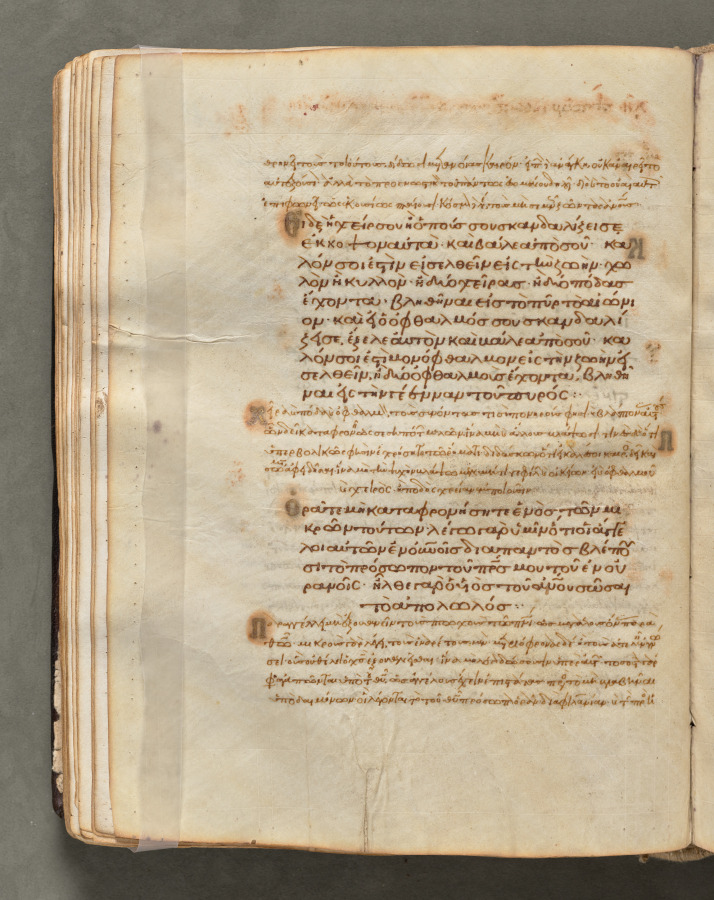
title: Text, folio 80 (verso), from a Gospel Book with Commentaries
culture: Byzantium, Constantinople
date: c. 1000–1100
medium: ink, tempera, and gold on vellum; leather binding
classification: Bound Volume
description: Each of the four gospels in this book opens on a page with brilliantly illuminated borders depicting the author of the text as well as birds-principally peacocks, symbols of the immortality of the soul-and fountains, representing the fountain of life and the salvation of the soul. This volume consists of 428 leaves with texts in Greek. Its level of sophistication suggests that it was probably written and decorated in a monastery in Constantinople.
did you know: Gospel Books were carried in procession through Byzantine churches.